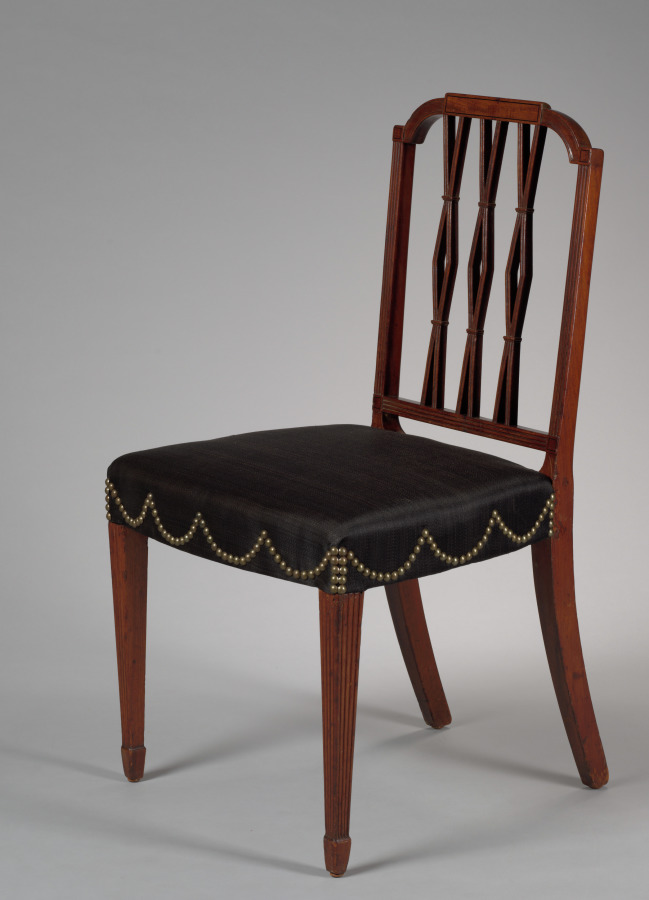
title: Side Chair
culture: America, Massachusetts, Boston, late 18th Century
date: c. 1790–1800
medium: mahogany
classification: Furniture and woodwork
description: Chairs of this or similar design seem to have been made by several Boston cabinetmakers. This chair may have belonged to one or more members of the distinguished Derby family or West family-or both-of nearby Salem, Massachusetts.